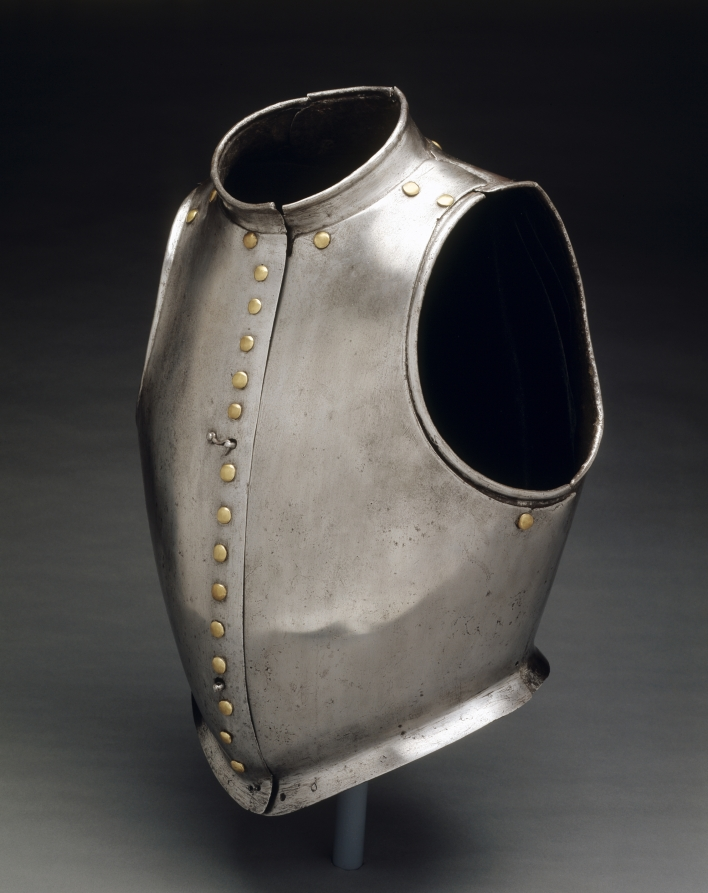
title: "Waistcoat" Cuirass (Combined Breast and Backplates)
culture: North Italy, 16th century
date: c. 1580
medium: Steel; brass rivets simulating buttons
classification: Arms and Armor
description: This cuirass is a specialized type of costume armor. In addition to protecting its owner's torso, it was clearly intended to simulate a civilian jacket, or doublet, with a row of buttons down the front. The owner would have opened it like an ordinary doublet since the two halves are hinged to a narrow backplate.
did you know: While it would provide some protection to the torso, the armor here is very light; fashion not function was the prerequisite.